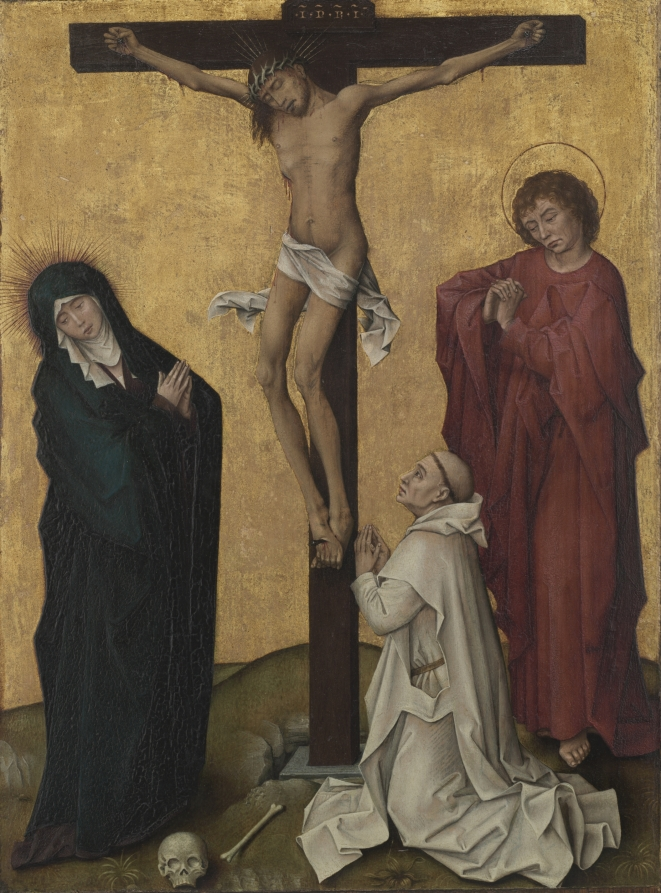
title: The Crucifixion with a Carthusian Monk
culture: Netherlands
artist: workshop of Rogier van der Weyden (Flemish, c. 1399–1464)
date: 1460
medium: oil and gold on wood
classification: Painting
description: This painting shows a Carthusian monk kneeling in devotion and prayer before the Crucifixion. It is likely that this panel was intended for the cell of a monk in an unknown monastery. The Carthusians were particularly devoted to the Passion and Crucifixion of Christ, and devotional images were provided for each monk’s cell. The Carthusian order was founded by Saint Bruno in 1084 with the purpose of providing the strictest separation from the world. The first Carthusians were dedicated to contemplation through silence, prayer, poverty, penance, and almost continuous occupancy of a solitary cell. The solitary life could only be maintained through the establishment of separate cell houses. Each community of monks was limited to the apostolic number of 12, though exceptions were sometimes made. They were recognized by their white, full-length, cowled habit called the scapular, shown here. The artist has not been identified.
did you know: Carthusian monks can easily be identified by the white scapular or large rectangular piece of fabric, which is joined by bands at the side and has a hood attached to it.